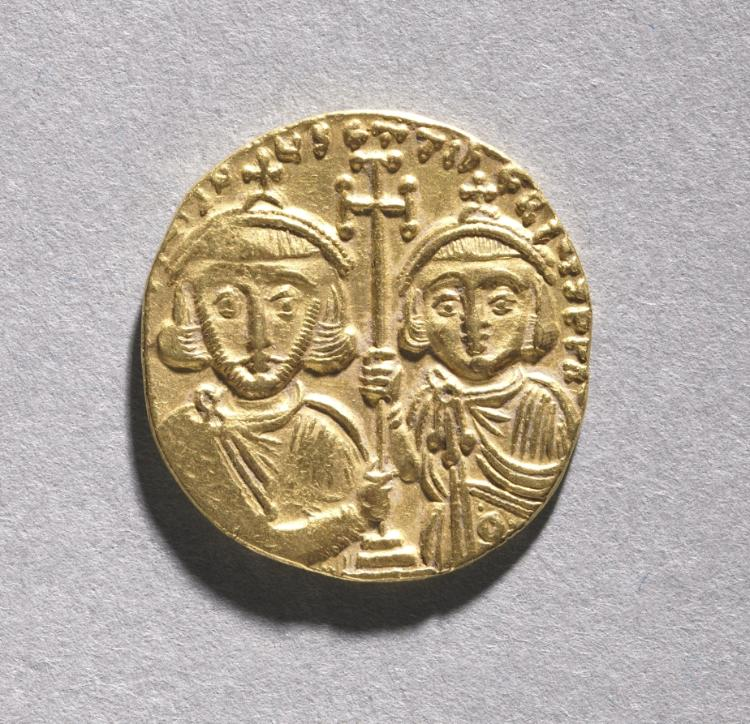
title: Solidus with Justinian II Rhinometus and His Son Tiberius (reverse)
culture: Byzantium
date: 705–711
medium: gold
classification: Coins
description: The vast number of surviving Byzantine coins attests to the level of trade across the empire. Controlled and supervised by the emperor, the producers of coins took care to represent his authority and reflect his stature. Talented artists were recruited to engrave the dies (molds) used for the striking of coins. Emperors increasingly came to include their heirs and co-emperors on their coinage, as well as other family members or even earlier rulers. Coins were recognized, then as now, as small, portable works of art. With their inscriptions and images, Byzantine coins provide valuable documentation of historical events and a record of the physical appearance of the emperors. The solidus is the basic gold coin of 24 karats; the tremissis, a gold coin of one-third the weight and value of the solidus; and the nomisma, which in the 10th century replaced the solidus as the standard gold coin.